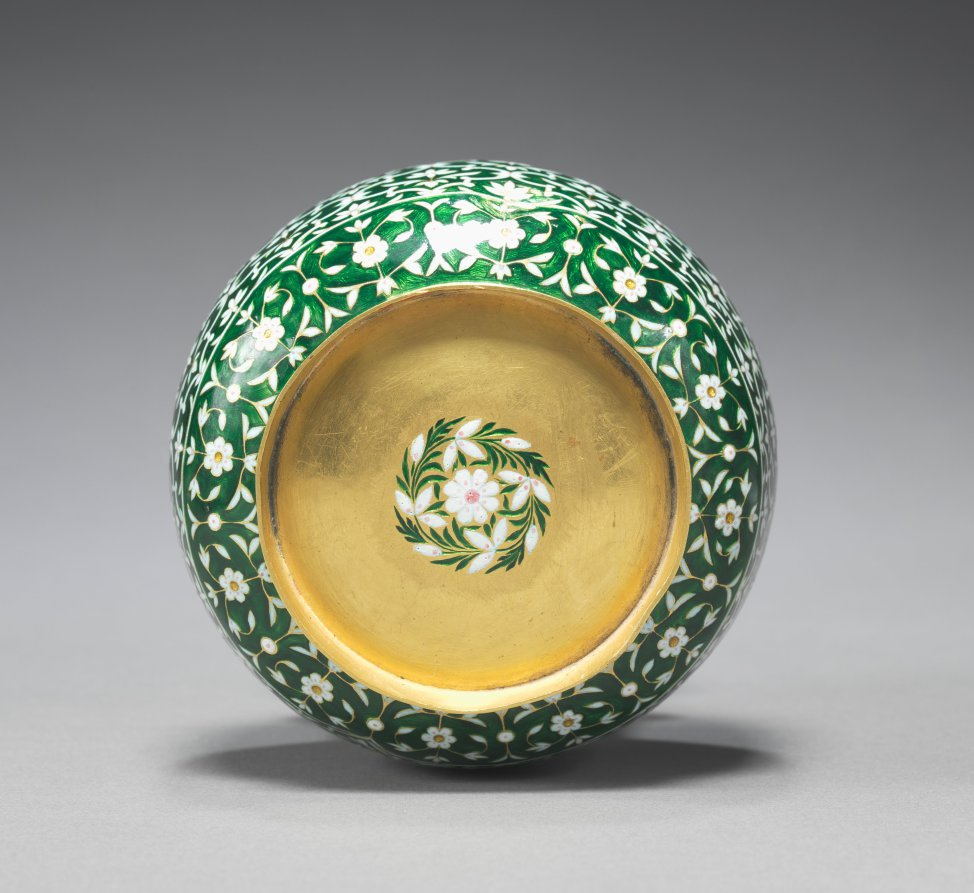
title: Lota: Covered Jar on Narrow Foot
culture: India, Jaipur, late 17th-early 18th Century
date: c. 1700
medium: cloisonne enamel on gold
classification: Enamel